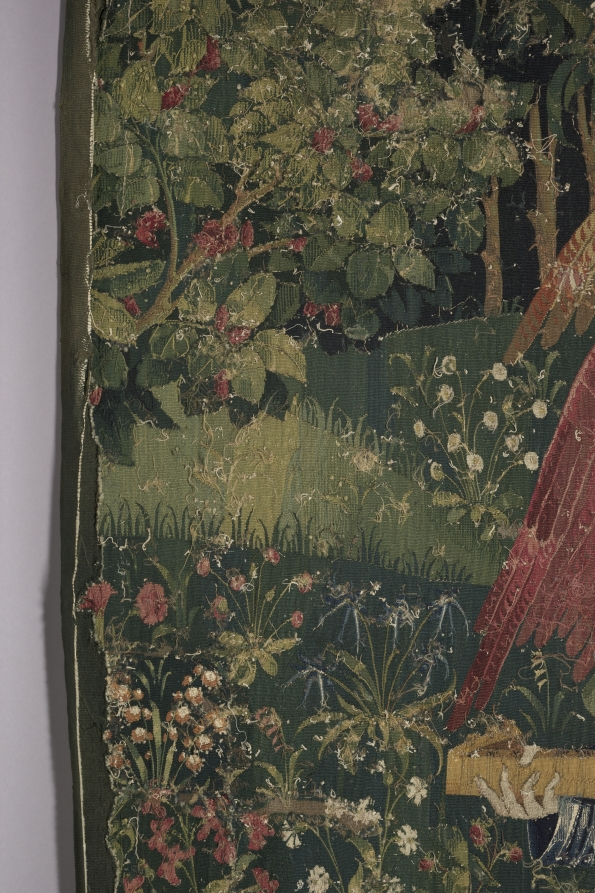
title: The Triumph of Eternity (from Chateau de Chaumont set)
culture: France, Lyon(?), early 16th century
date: 1512–15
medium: silk and wool; tapestry weave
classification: Tapestry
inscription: French verse in Gothic letters translates as follows: "Nothing triumphs by right authority, Unless it be conducted by Eternity. Nothing is permanent beneath the firmament, But above us triumphs Eternity."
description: The Triumph of Eternity is represented by the Coronation of the Virgin. Dressed in crimson velvet with an opulent brocaded velvet shawl, the Virgin is seated in the center as two angels hold a crown over her head. Five musical angels surround her playing an organ, recorder, straight cornetto, harp, and lute, while another sings from an open music book. The scenes in the set display a conservative style in which the figures are placed in shallow landscapes, thereby ignoring pictorial innovations for depicting space and mass. The verse in Old French at the top states: Nothing triumphing by due authority Remains permanent and durable. Nothing is permanent under the heavens, But above, eternity triumphs.